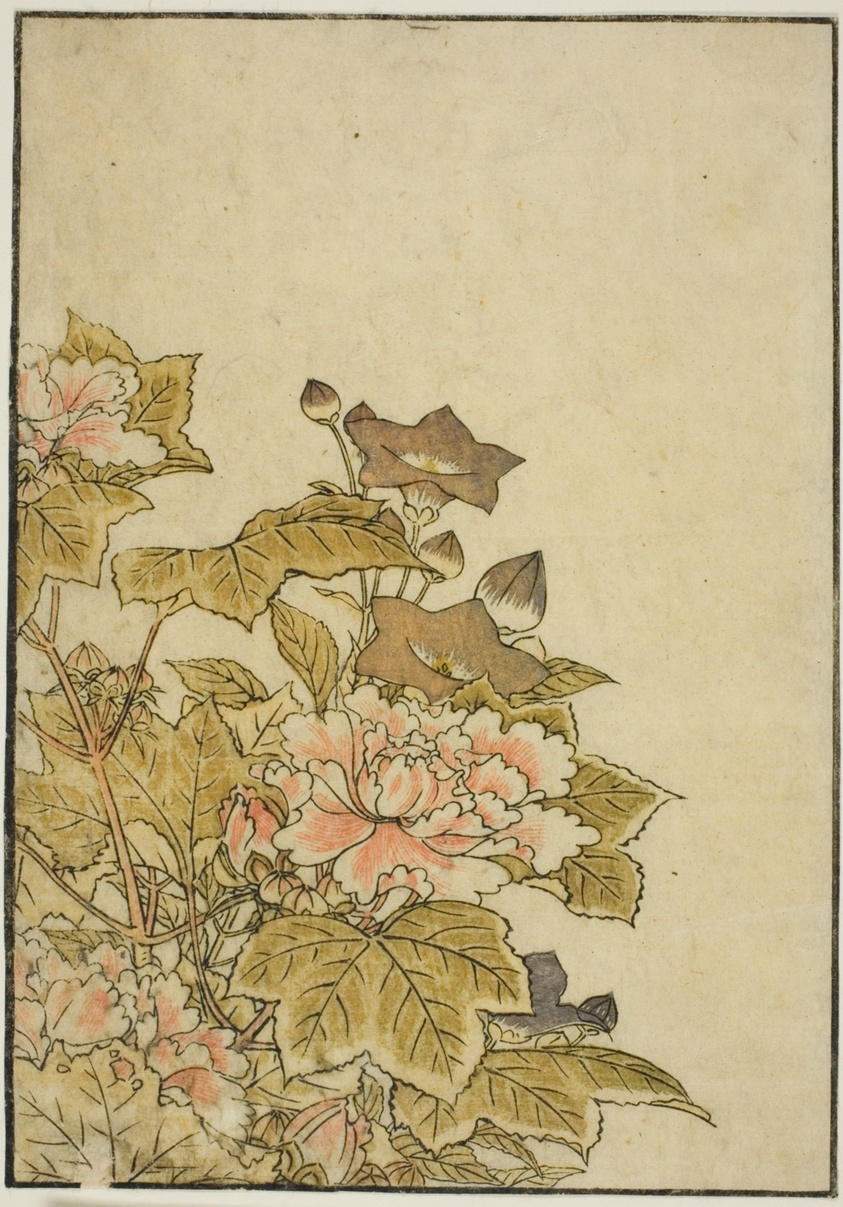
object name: Print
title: Autumn Flowers: Peonies and Bellflowers, from the book "Mirror of Beautiful Women of the Pleasure Quarters (Seiro bijin awase sugata kagami)," vol. ２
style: Japanese (culture or style)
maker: Katsukawa Shunsho; Japanese, 1726-1792; Kitao Shigemasa; Japanese, 1739-1820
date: 1776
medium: Color woodblock print; single-page illustration cut from a book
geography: Japan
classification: woodblock print; print; asian art